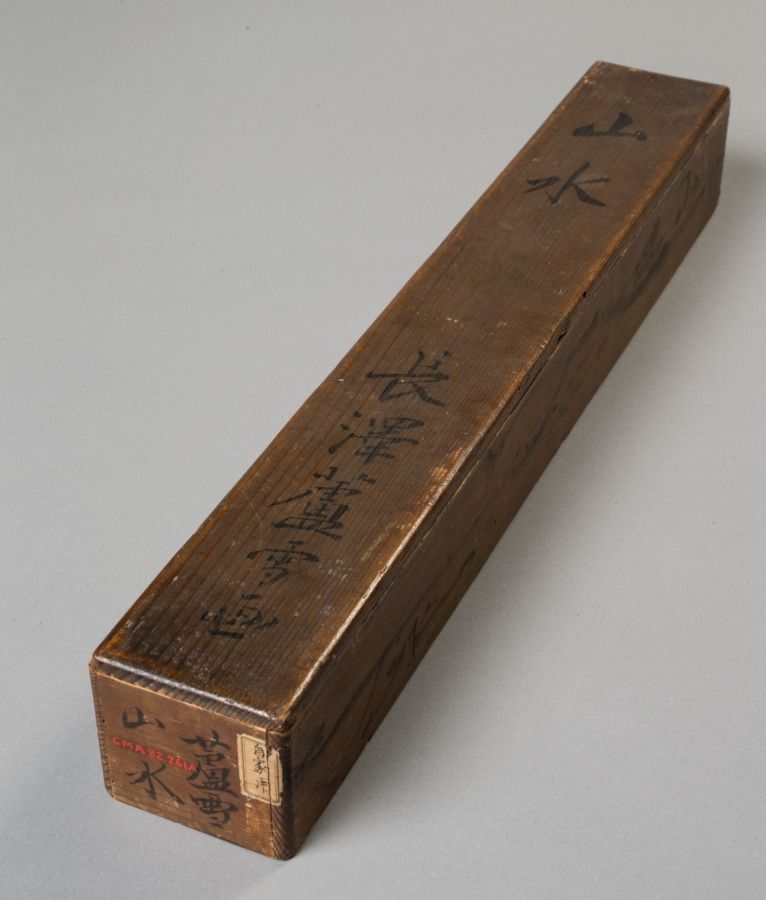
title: Mountains and Distant Boats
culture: Japan, Edo period (1615–1868)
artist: Nagasawa Rosetsu (Japanese, 1754–1799)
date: late 1700s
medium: hanging scroll; ink and slight color on paper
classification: Painting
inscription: Signed: 蘆雪; Sealed: 引裾